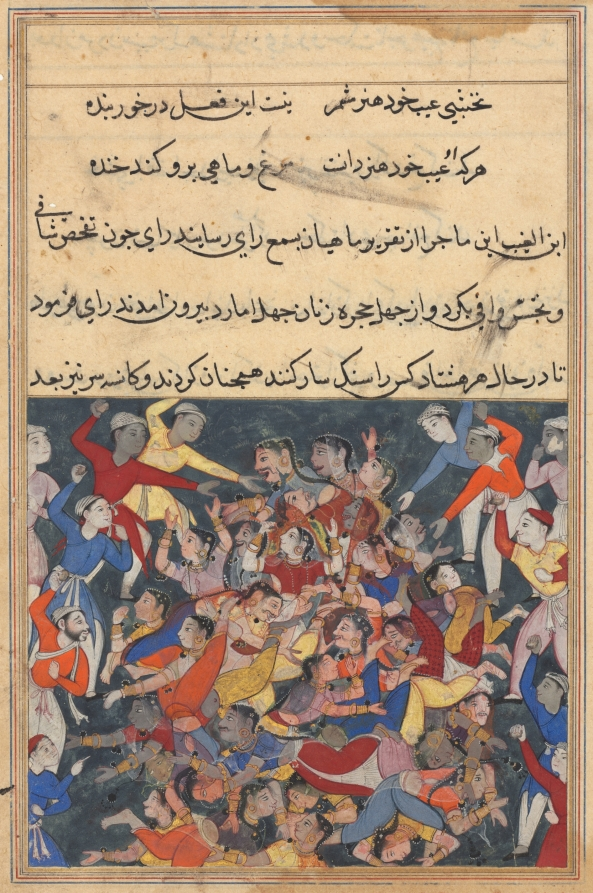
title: The forty wives and their secret paramours being punished by stoning to death, from a Tuti-nama (Tales of a Parrot): Twenty-third Night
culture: Mughal India, court of Akbar (reigned 1556–1605)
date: c. 1560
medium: gum tempera, ink, and gold on paper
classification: Painting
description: The Raja’s wives have been hiding forty young men dressed as women in their chambers. When their amorous affairs were revealed, all eighty were killed. Their deaths fulfilled an old prophecy written on a mysterious skull. The Raja’s men stand on the edges of the composition, hurling stones into the pile of intertwined bodies.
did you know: Mustaches are visible on several women in the pile, indicating that they are men in disguise.